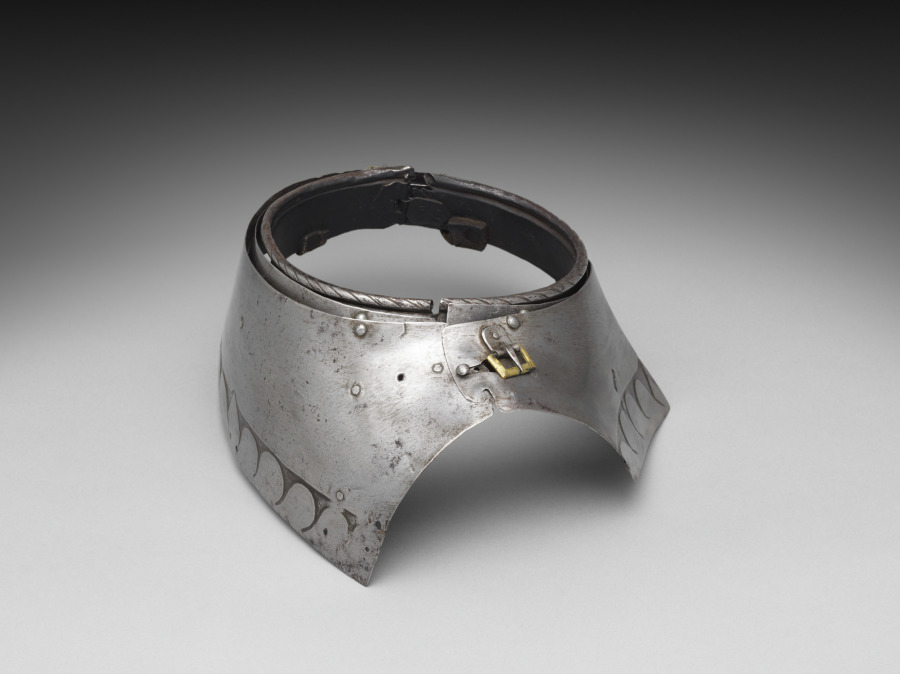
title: Gorget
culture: Germany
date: 1500s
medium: steel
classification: Arms and Armor